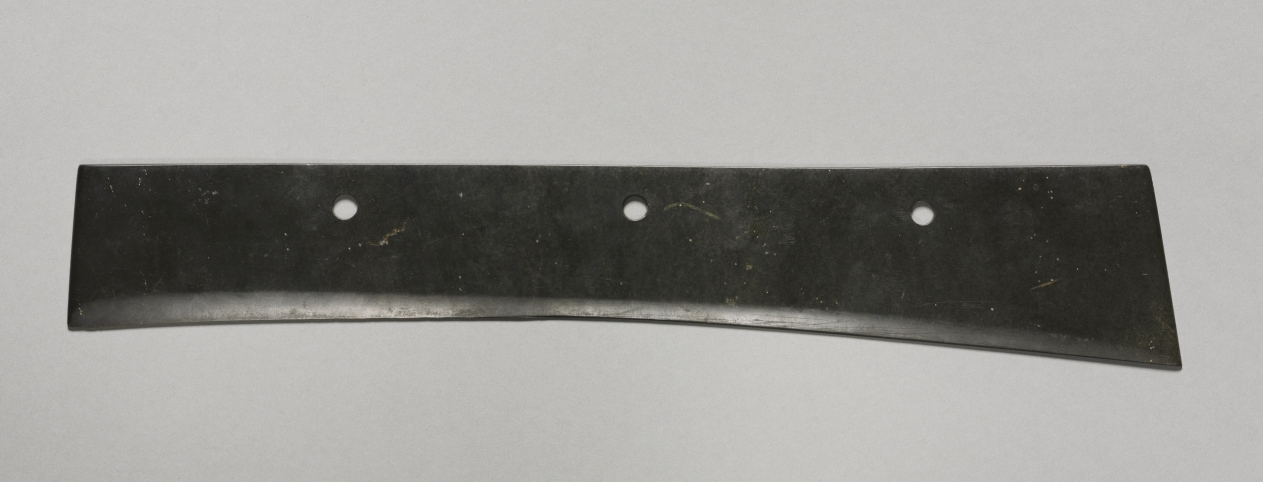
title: Ceremonial Blade with Three Perforations (Dao)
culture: Northwest China, Neolithic period to Bronze Age, Qijia culture (2000–1700 BCE)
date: 2000–1700 BCE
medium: jade (nephrite)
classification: Jade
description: This impressive blade combines the beauty of material, precision of geometry, and mastery of technique. The fine polish, silken sheen, and extreme thinness (only 2 mm thick) make it an outstanding example of meticulous workmanship in ancient jade craft. Recent recoveries of similar blades from a pit of a Qijia cultural site located in northwest China reveal that they were originally standing on their edges and were arranged in parallel formations at the ritual ground.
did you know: Although it may look made of metal, this blade is actually skillfully worked jade.